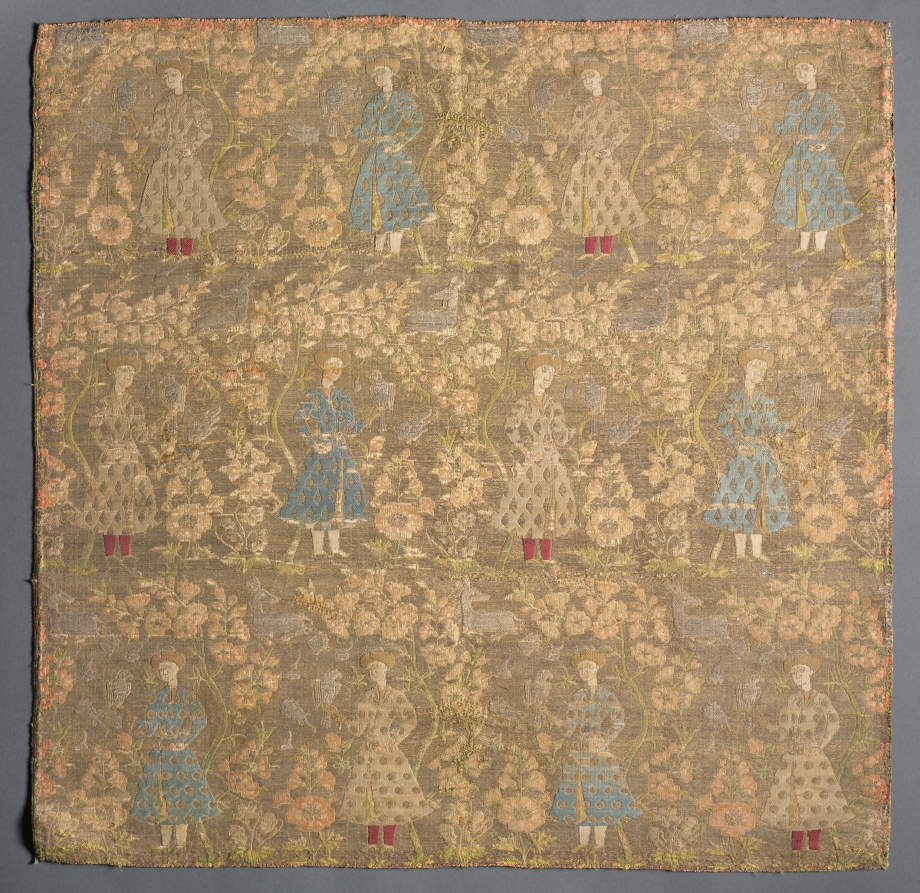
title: Section of Silk Fabric with Falconers Amid Rose Bushes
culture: Iran, Safavid period (1501–1722)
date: c. 1675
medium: Silk and silver-metal thread: twill weave with complementary and discontinuous weft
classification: Textile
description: Twill-weave fabrics were used to make garments, especially jackets, during the Safavid period. It was not until after the 1570s that Iranian textiles began to regularly feature the human figure as a decorative motif. Weavers drew from Persian paintings for their subject matter, such as the favorite princely pastime of falconing. Trained falcons were brought on royal hunts to locate and retrieve the prey; close relationships developed between the falcon and the falconer.